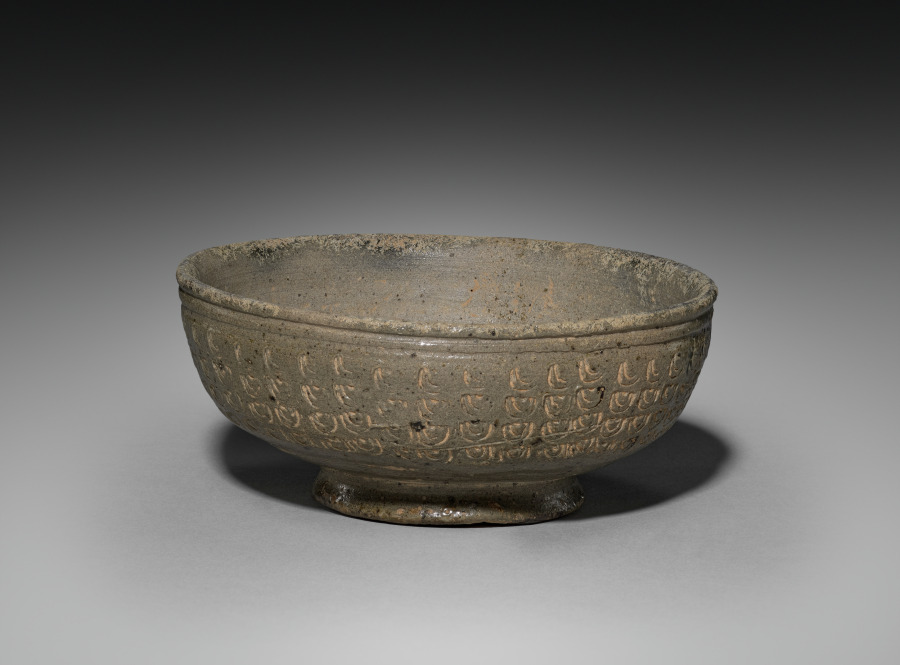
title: Burial Urn with Stamped Design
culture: Korea, Unified Silla period (676-935)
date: 500s–600s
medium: stoneware with stamped designs under olive-green glaze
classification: Ceramic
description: After the introduction of Buddhism, cremation became a common practice in Korea. This jar, which once contained the remains of the dead, may have nested in a larger stone container. The repetitive patterns that appear on the lid and the container was done with a stamping technique.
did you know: Containing the remains of the dead, this type of ancient clay pottery was excavated from tombs.